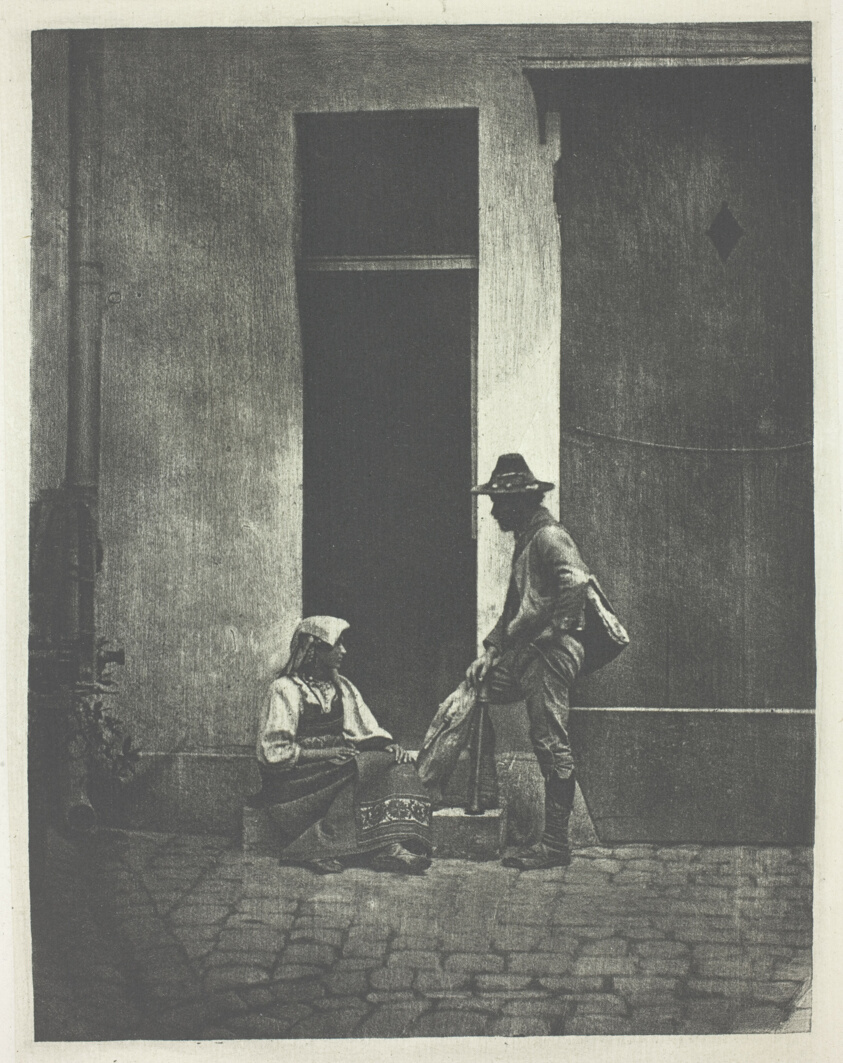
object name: Photograph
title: Pifferaro debout et paysanne Italienne assise, dans la cour du 21 Quai Bourbon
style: 19th century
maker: Charles Nègre (French, 1820–1880)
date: c. 1855, printed 1982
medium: Photogravure, from the portfolio "Charles Negre: Treize Heliogravures, 1854-1857"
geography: France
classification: photogravure; photomechanical process; photography; photograph